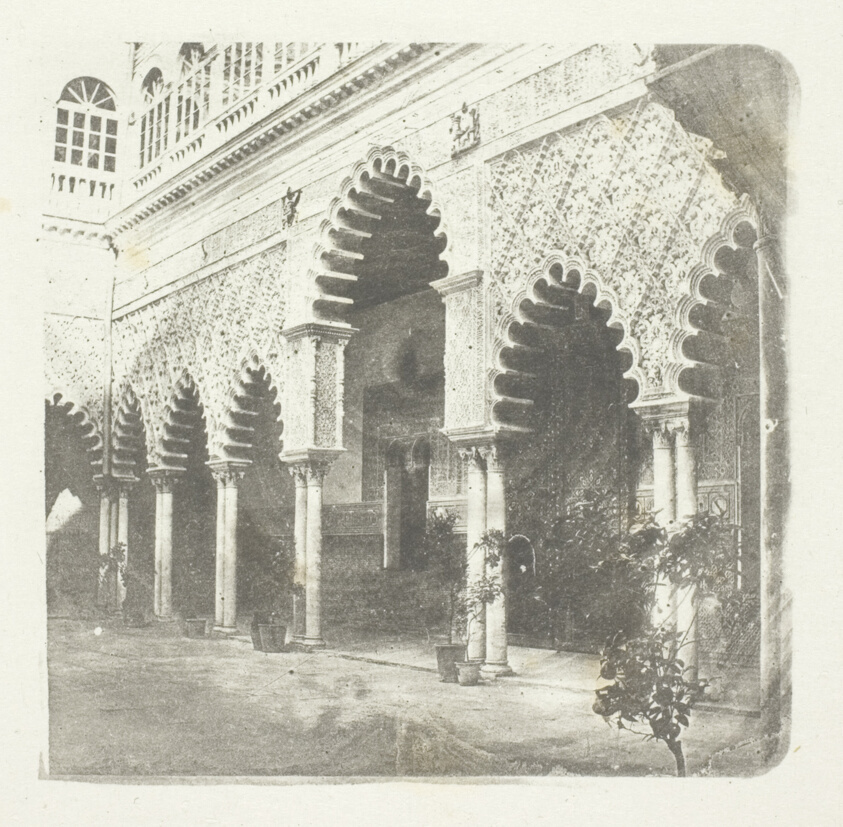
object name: Photograph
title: Alcazar de Seville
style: 19th century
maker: William Henry Fox Talbot (English, 1800–1877)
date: c. 1853/58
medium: Photoglyphic engraving employing resin ground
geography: England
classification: engraving; printing process; photography; photograph